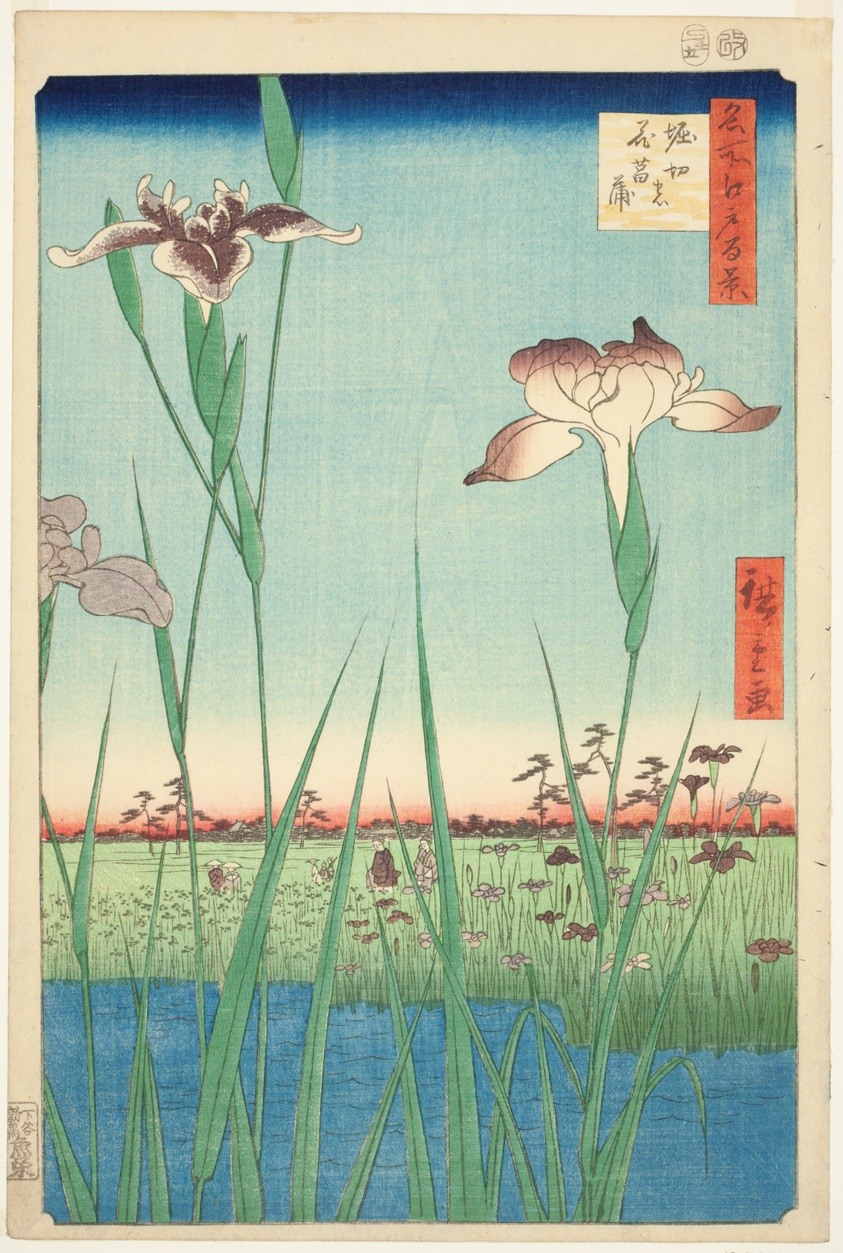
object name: Print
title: Irises at Horikiri (Horikiri no hanashobu), from the series "One Hundred Famous Views of Edo (Meisho Edo hyakkei)"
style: Japanese (culture or style)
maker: Utagawa Hiroshige 歌川 広重; Japanese, 1797-1858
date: 1857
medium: Color woodblock print; oban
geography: Japan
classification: woodblock print; print; asian art